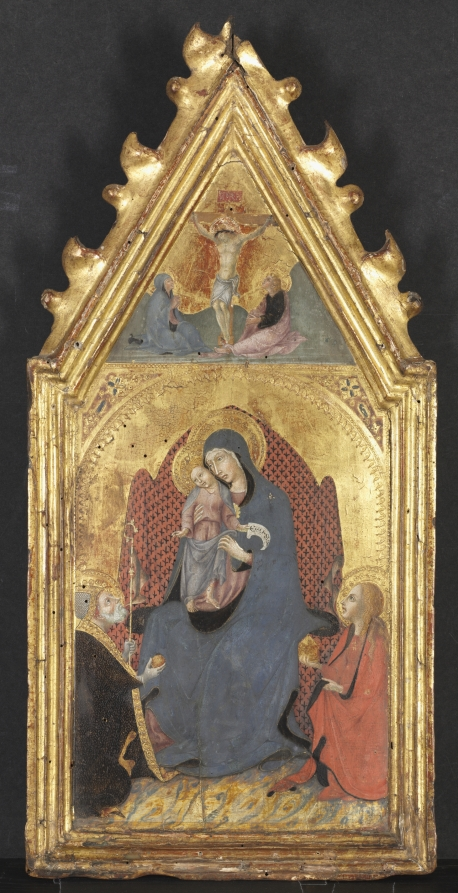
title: Virgin and Child Adored by Saints Mary Magdalene and Nicolas of Bari; Christ Crucified with the Virgin and Saint John the Evangelist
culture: Italy, Siena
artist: Sano di Pietro (Italian, 1406–1481)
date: 1400s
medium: tempera and gold on wood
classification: Painting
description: The artist covered the sides and reverse of this panel with a thin layer of gesso (a type of plaster), allowing the texture of the rough wood to remain visible. He then painted it to resemble porphyry, a beautiful and valuable stone.